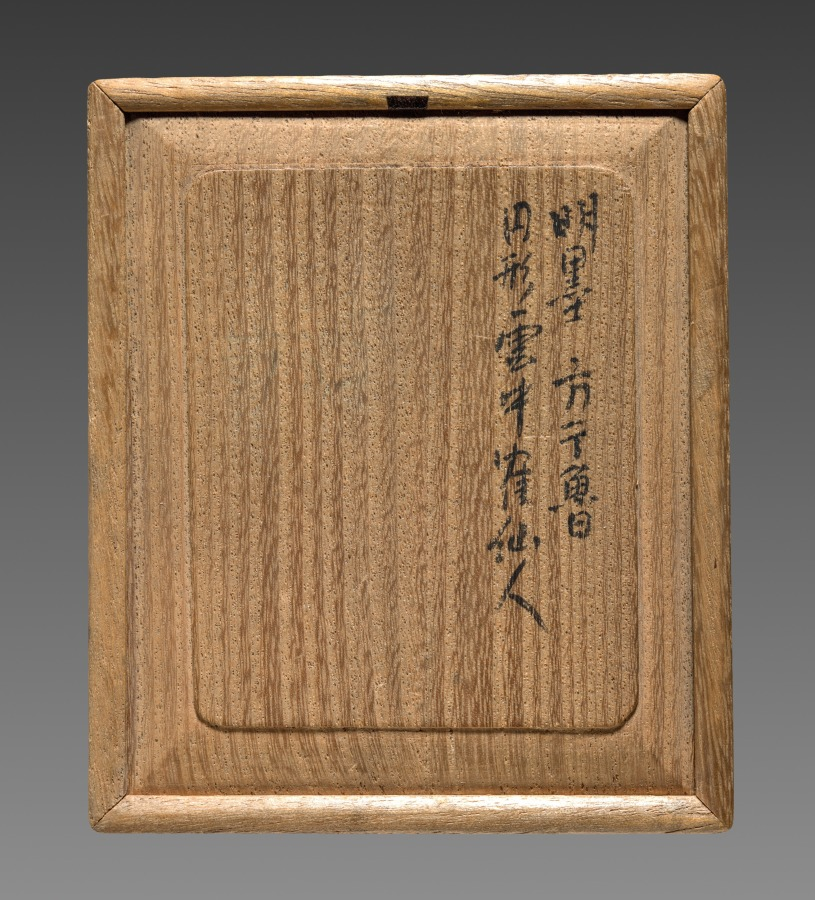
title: Ink Cake with Wang Ziqiao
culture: China, Ming dynasty (1368-1644) - Qing dynasty (1644-1911)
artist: attributed to Fang Yulu (Chinese, active c. 1570–1619)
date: c. 1600s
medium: Molded ink and gold pigment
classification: Miscellaneous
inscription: Mark on base: 于魯監製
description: Ink cakes were dissolved with water to be used for writing and painting. This ink cake depicts the immortal Wang Ziqiao riding a crane and playing a sheng (wind instrument with reeds). Legend says that he was a prince who became a Daoist immortal. The design was likely borrowed from an illustrated Ming dynasty book on Daoist immortals printed in Anhui, the Liexian Quanzhuan. Ink cakes using Fang Yulu’s name, a famous ink maker in Huizhou, Anhui province, may just as well be products of followers who aspired to profit from his fame. His greatest local rival was his former mentor Cheng Dayue (1541–after 1610).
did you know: The front, back, and sides of this ink cake are partially gilded.